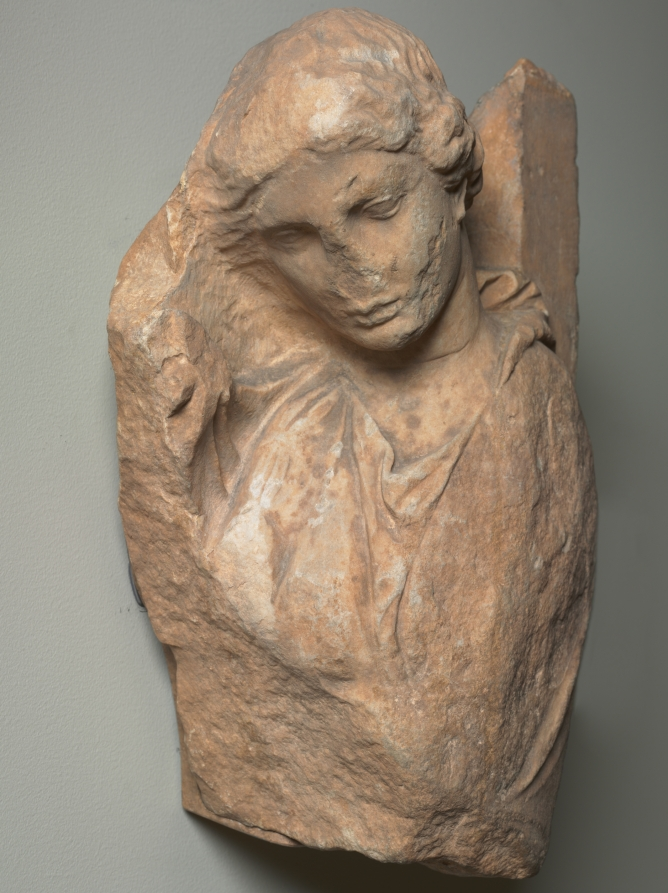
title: Grave Stele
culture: Greece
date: 400–350 BCE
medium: pentelic marble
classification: Sculpture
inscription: ...ΜΕΓΑΛΗΝ ΛΥΠΗΝ ΣΥ ΛΙΠΟΣΑ ΦΑΝ... ...ΔΕ ΣΕΠΩΙΚΤΙΣΕ ΜΟΙΡΑ ΠΟΘΕΙ...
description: Carved in high relief, the original composition of this Attic grave marker can be reconstructed by comparison with more complete examples elsewhere (such as the Stele of Hegeso in Athens [National Archaeological Museum, 3624]). The standing figure at left likely represents a maid or servant, her hair mostly contained within a sakkos (haircloth). Holding a pyxis (small container) in her left hand, she approaches the more fragmentary seated figure at right. This woman, draped and casting her eyes downward, represents the deceased, perhaps Phanostrate, as one scholar has restored the partial name Phan... inscribed in the fragmentary epigram on the preserved portion of the lintel.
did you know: The fragmentary seated woman at right represents the deceased.